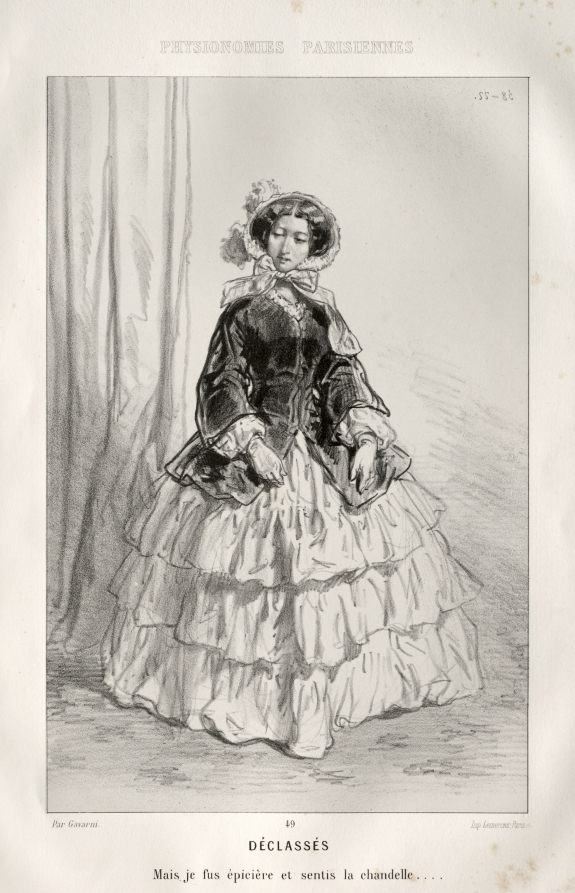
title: Déclassés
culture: France, 19th century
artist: Paul Gavarni (French, 1804–1866)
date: c. 1858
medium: lithograph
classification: Print